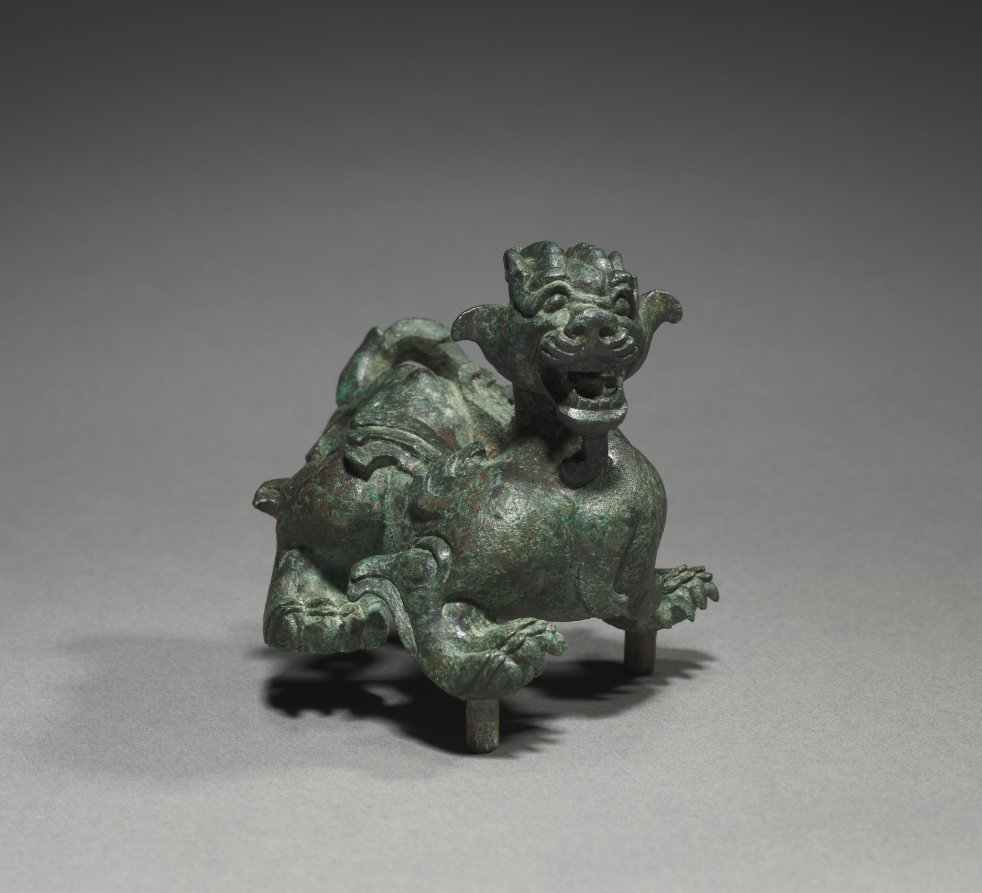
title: Winged Chimera (Bixie)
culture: China, Southern and Northern Dynasties period (386–589 CE)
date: 400s CE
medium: bronze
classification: Sculpture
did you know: A bixie is a fantastical hybrid creature that was believed to ward off evil spirits